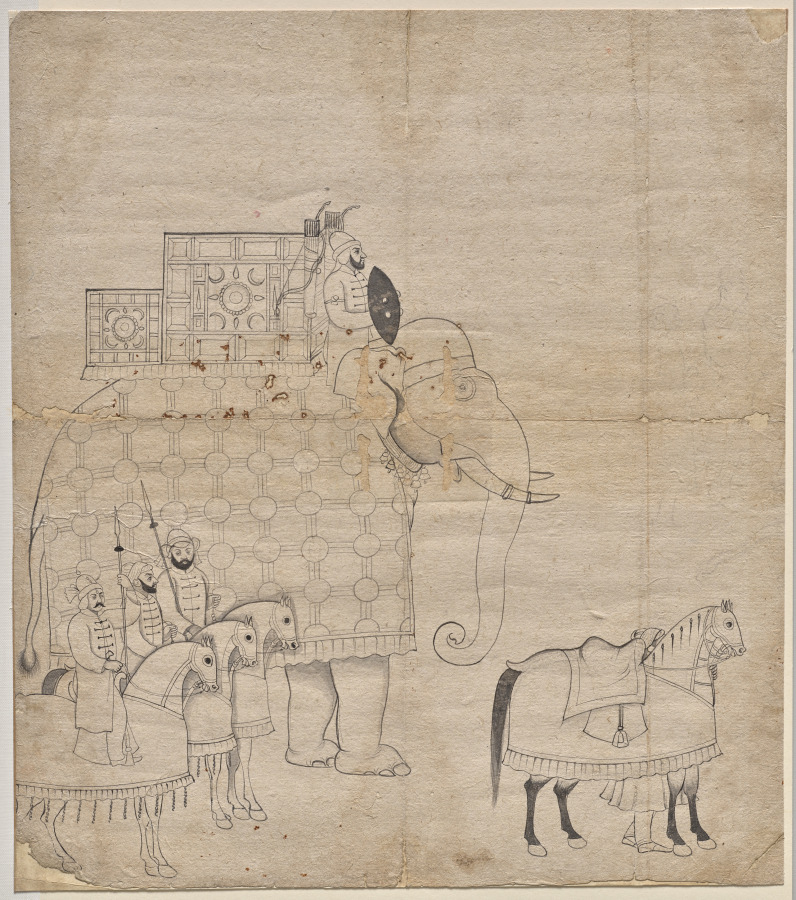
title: Caparisoned Elephant and Horses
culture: Northern India, Pahari kingdoms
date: c. 1750–55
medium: ink on paper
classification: Drawing